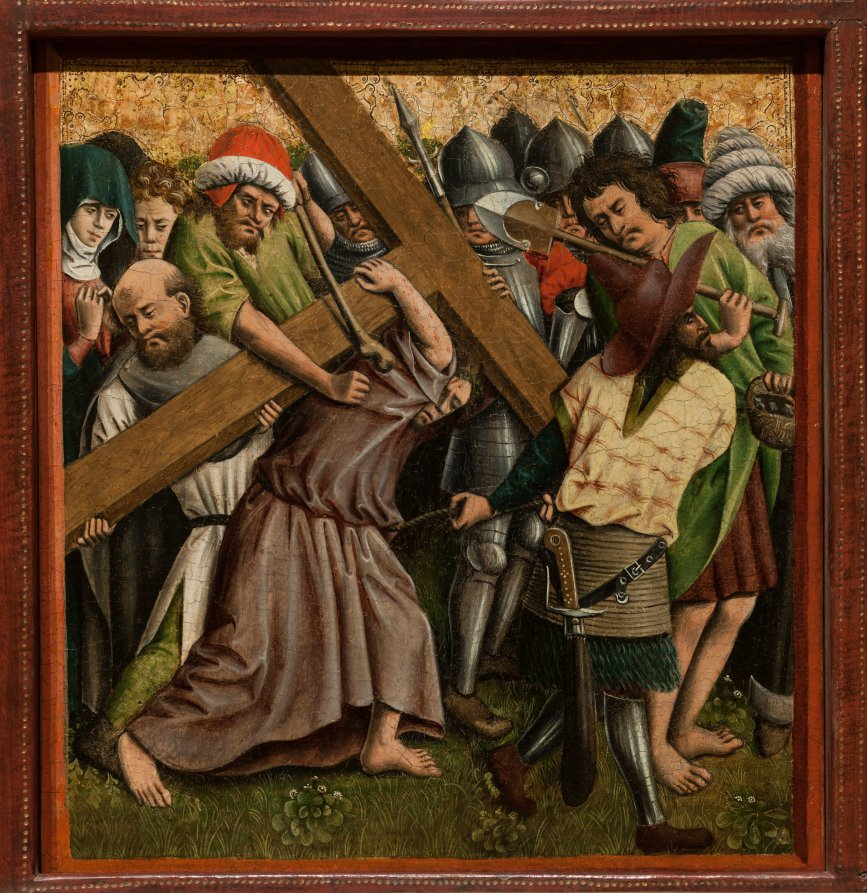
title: Altarpiece with The Passion of Christ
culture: Germany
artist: Master of the Schlägl Altarpiece (German)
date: c. 1440s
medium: oil and gold on wood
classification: Painting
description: The visual focus of this altarpiece is the suffering and death of Christ on the cross. So-called Passion cycles in art include the events leading up to and following the Crucifixion, not only as single subjects but as scenes meant to be read in sequence. Passion cycles were promoted by the two great teaching orders, the Franciscans and the Dominicans, for whom this subject represented the main religious drama of their churches, and also by the German mystics who advocated private contemplation on the humanity and suffering of Christ. The original context for this altarpiece remains unknown, but it was probably made for a religious institution in Westphalia in the Rhine Valley. During the 1870s it was given to the Abbey of Schlägl, near Linz in Upper Austria, from which both altarpiece and artist take their names. The altarpiece is not preserved today in its original format, and some of the individual scenes are missing. Scholars continue to debate the original number of scenes and their sequencing; nine of the original panels have survived, four are shown here.